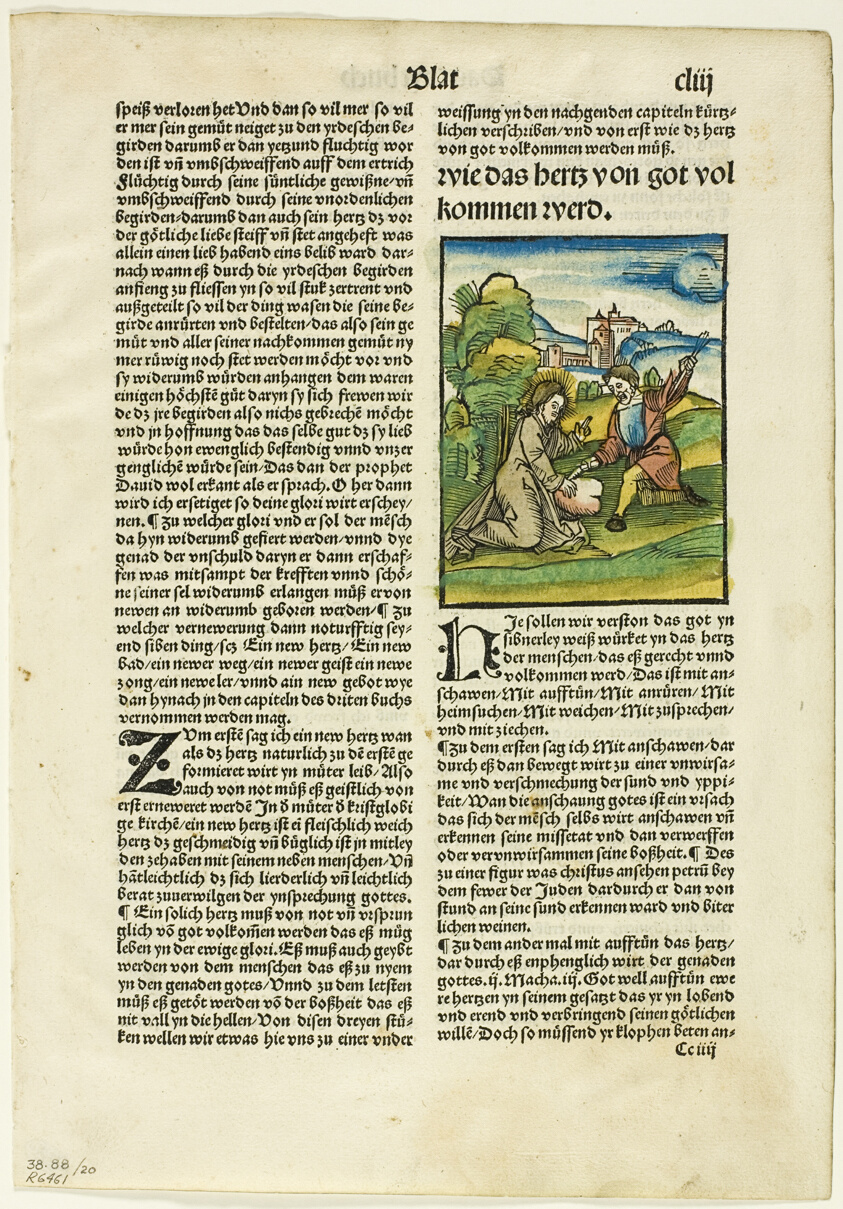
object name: Print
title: How the Heart Will Be Perfected by God from Der beschlossen gart des rosenkratz marie, plate twenty from Woodcuts from Books of the XVI Century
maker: Hans Leonhard Schäuffelein (German, 1480/90-1538/40); assembled by Max Geisberg (Swiss, 1875-1943)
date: 1505, assembled into portfolio 1937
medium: Hand-colored woodcut on paper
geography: Germany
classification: woodcut; print; prints and drawing